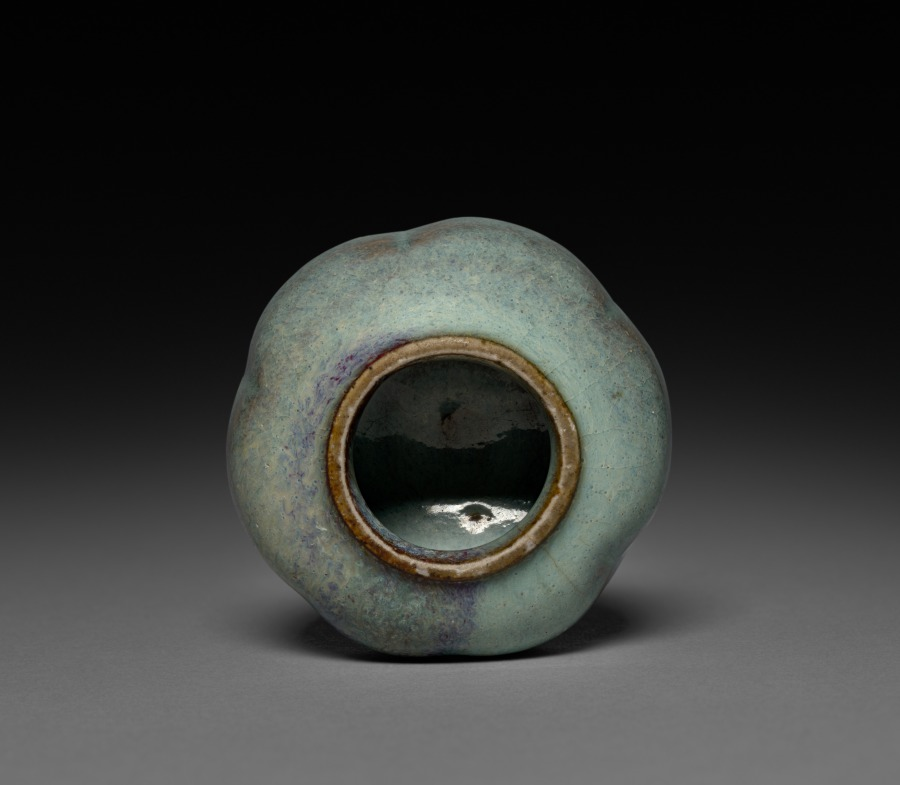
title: Small Lobed Jar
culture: Northern China, Jin dynasty (1115-1234) - Yuan dynasty (1271-1368)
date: 1115–1368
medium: glazed buff stoneware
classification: Ceramic